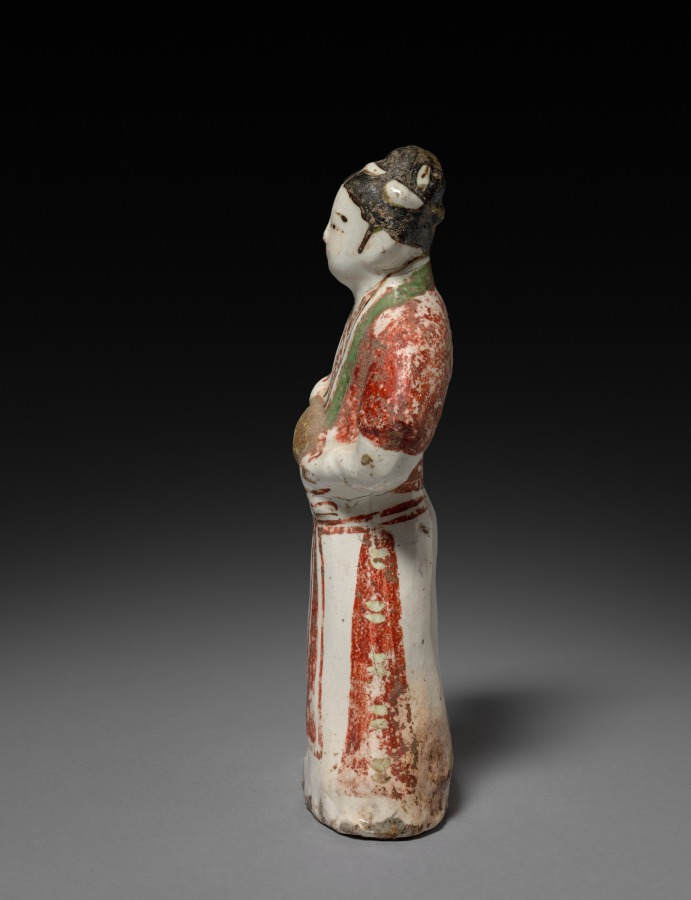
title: Lady Holding a Vase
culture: China, Northern Song dynasty (960-1127) - Jin dynasty (1115-1234)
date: 1100s–1200s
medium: Stoneware with slip decoration, Cizhou ware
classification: Ceramic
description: The Cizhou ware kilns never produced for the imperial court, but made potted utensils needed in daily life. They also fired ceramic figurines, which are believed to have been used as toys. The maid or palace lady here holds a long-necked vase of a type that watered flowers. The figurine, perhaps made as a toy for a girl, was molded in clay and covered with a white slip and transparent glaze, over which some colors in red, green, and ocher were applied. Cizhou kiln potters were one of the first in China who applied overglaze enamel-like colors on glazed, high-fired ceramics.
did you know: This hollow stoneware figure of a woman has firing hole visible at the bottom.